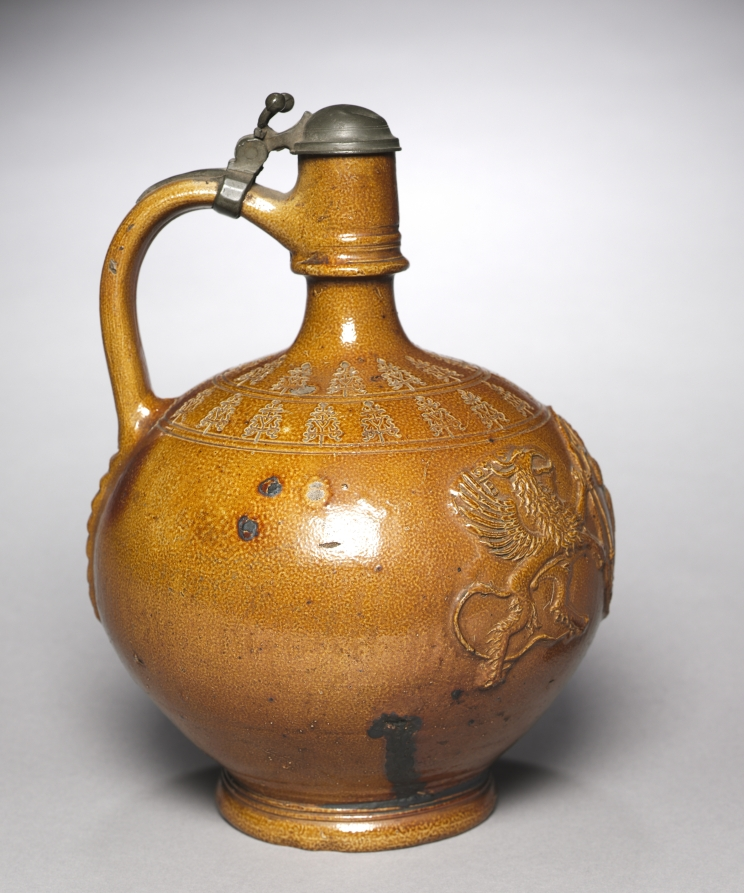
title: Jug with Pewter Lid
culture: Germany, Raeren, 17th century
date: 1602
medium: stoneware, brown glaze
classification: Ceramic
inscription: above the figure of a woman: 1602; above the left griffin: G / E ; above the right griffin: V / S.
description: German Stoneware The production and export of German stoneware reached its peak in the late 1500s. Prized for its durability and stone-like appearance, German stoneware became one of the most widely traded forms of pottery, even finding popularity in early America. The distinctive pebbly glass surface, resembling an orange peel, was achieved by introducing salt into the hot kiln during the firing process. This glaze gave clear definition to the coats of arms or other emblems that often formed the surface decoration on large works, usually jugs.